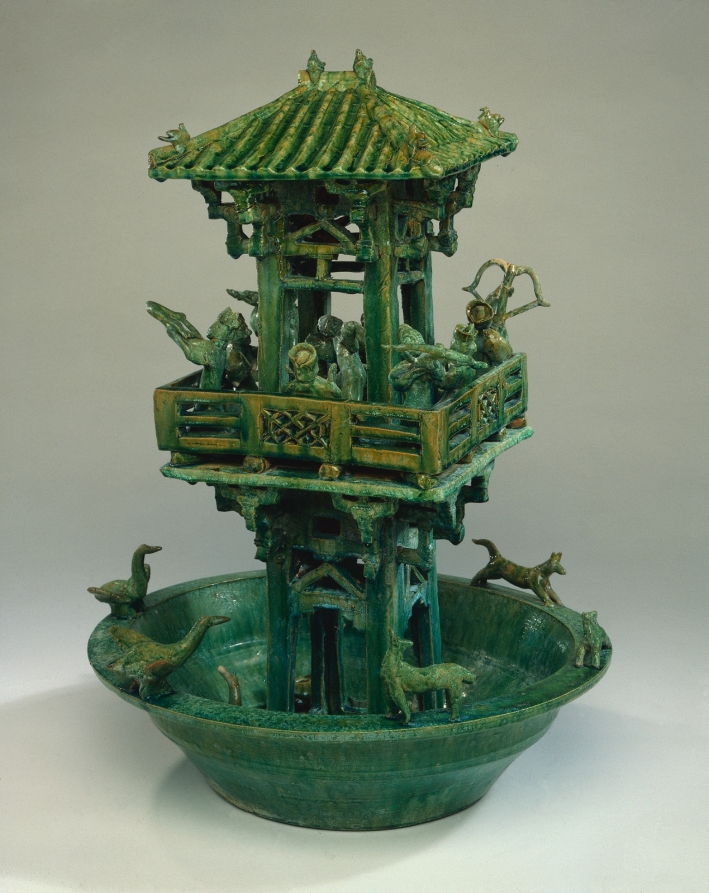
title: Watchtower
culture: China, Eastern Han dynasty (25–220 CE)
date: 25–220 CE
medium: earthenware with lead glaze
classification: Ceramic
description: In this funerary sculpture of the watchtower is a lively retinue of hunters, musicians, dancers, and domestic animals. The representation provides a vivid picture of the worldly enjoyment to be perpetuated in the otherworldly realm of the afterlife. A low-temperature lead glaze is applied to its earthenware body, enhancing the modeled forms with a brilliant, smooth coating like a layer of opaque glass.